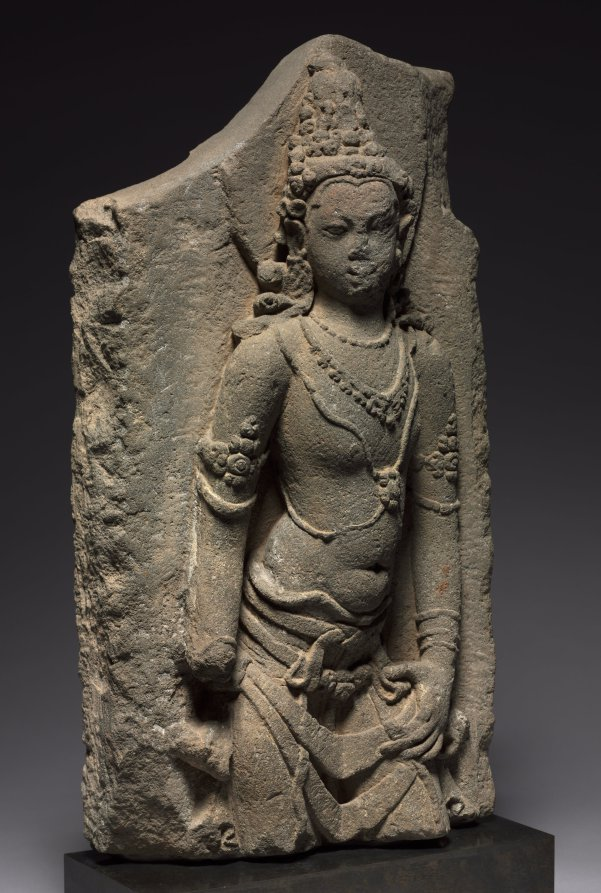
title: Door Guardian, Mahakala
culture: Indonesia, Central Java, Chandi Suko, 9th century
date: 800s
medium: volcanic stone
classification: Sculpture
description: The natural stance of this richly adorned figure indicates that he served as an attendant: the face turns to his right, while his midsection turns to the left, and the weight is on his right leg. A plain ovoid halo indicates that he is divine. The broken right hand may have held an implement or weapon that would aid in a more precise identification.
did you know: The crossed chest ornament, called a "channavira" in Sanskrit, denotes power and valor.